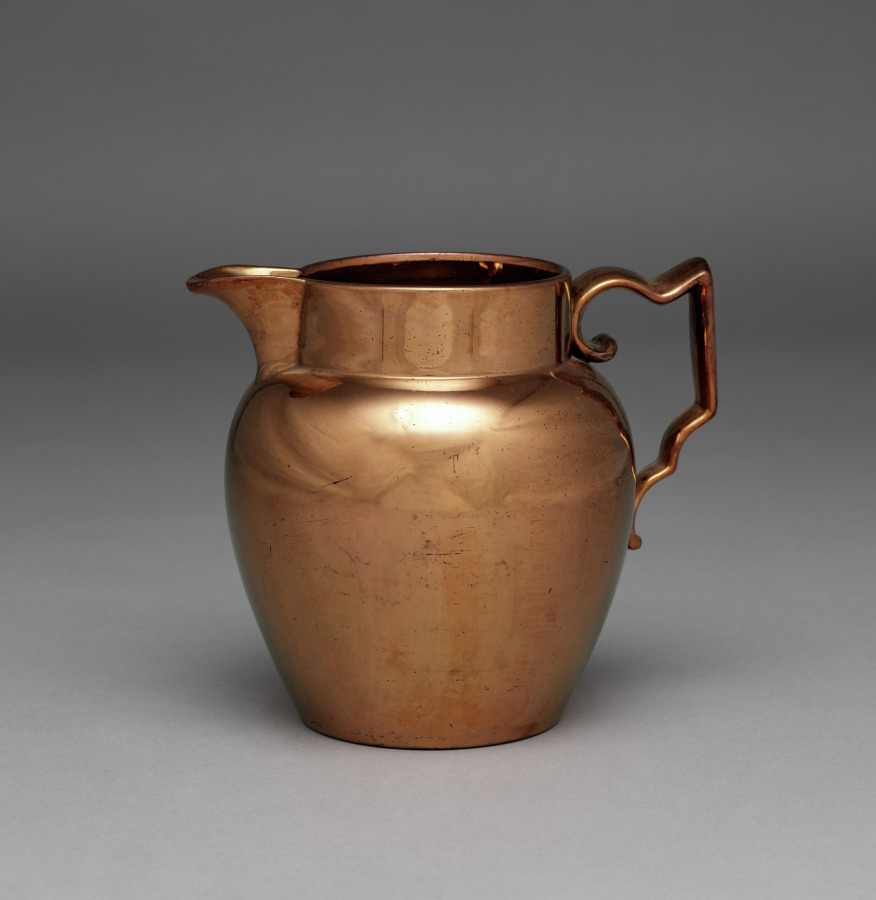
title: Copper-lustre Pitcher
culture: England, early 19th century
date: c. 1812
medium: ceramic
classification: Ceramic